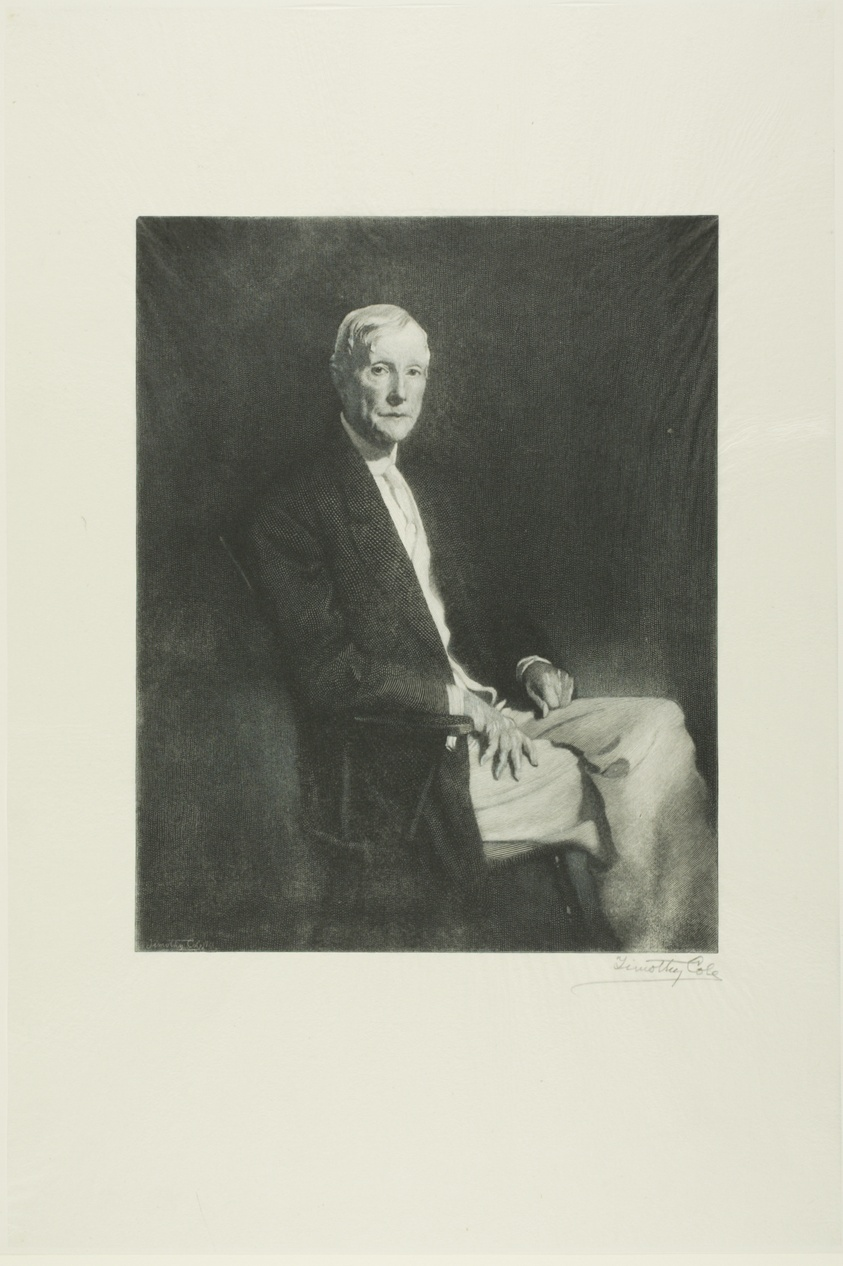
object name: Print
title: Portrait of John D. Rockefeller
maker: Timothy Cole (American, born England, 1852-1931); after John Singer Sargent (American, 1856-1925)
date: 1921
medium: Wood engraving on cream China paper, tipped onto ivory wove paper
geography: United States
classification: wood engraving; print; prints and drawing